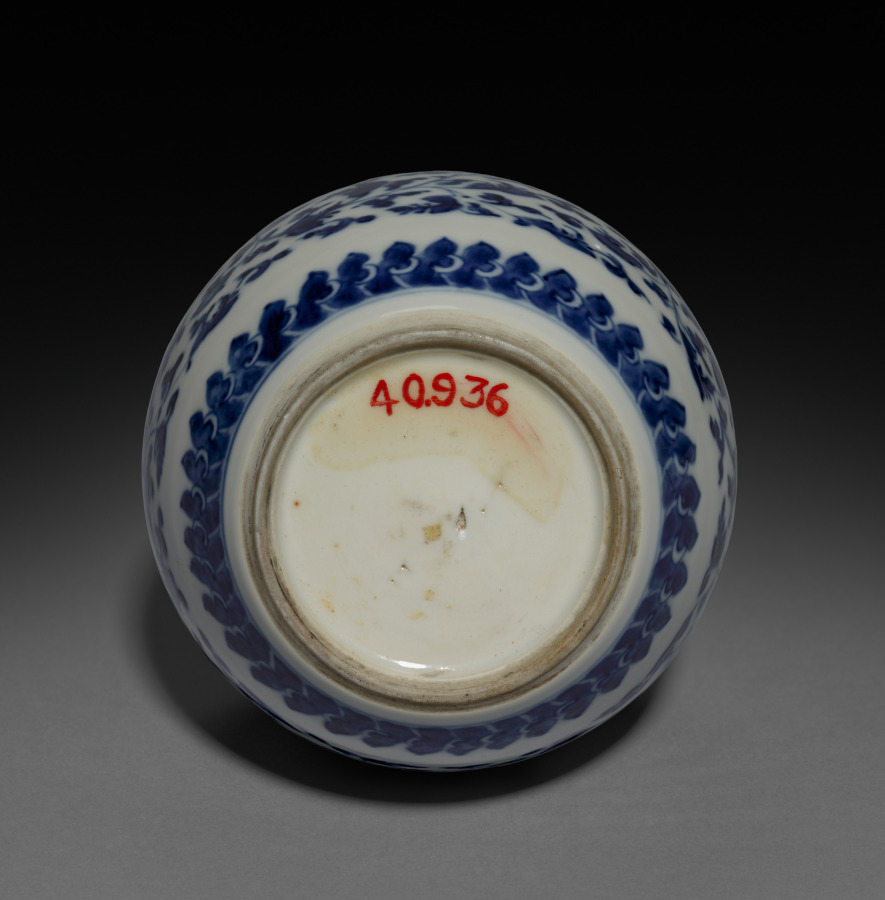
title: Globular Vase with Long Neck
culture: China, Qing dynasty (1644-1911), Kangxi reign (1661-1722)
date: 1661–1722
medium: porcelain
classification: Ceramic